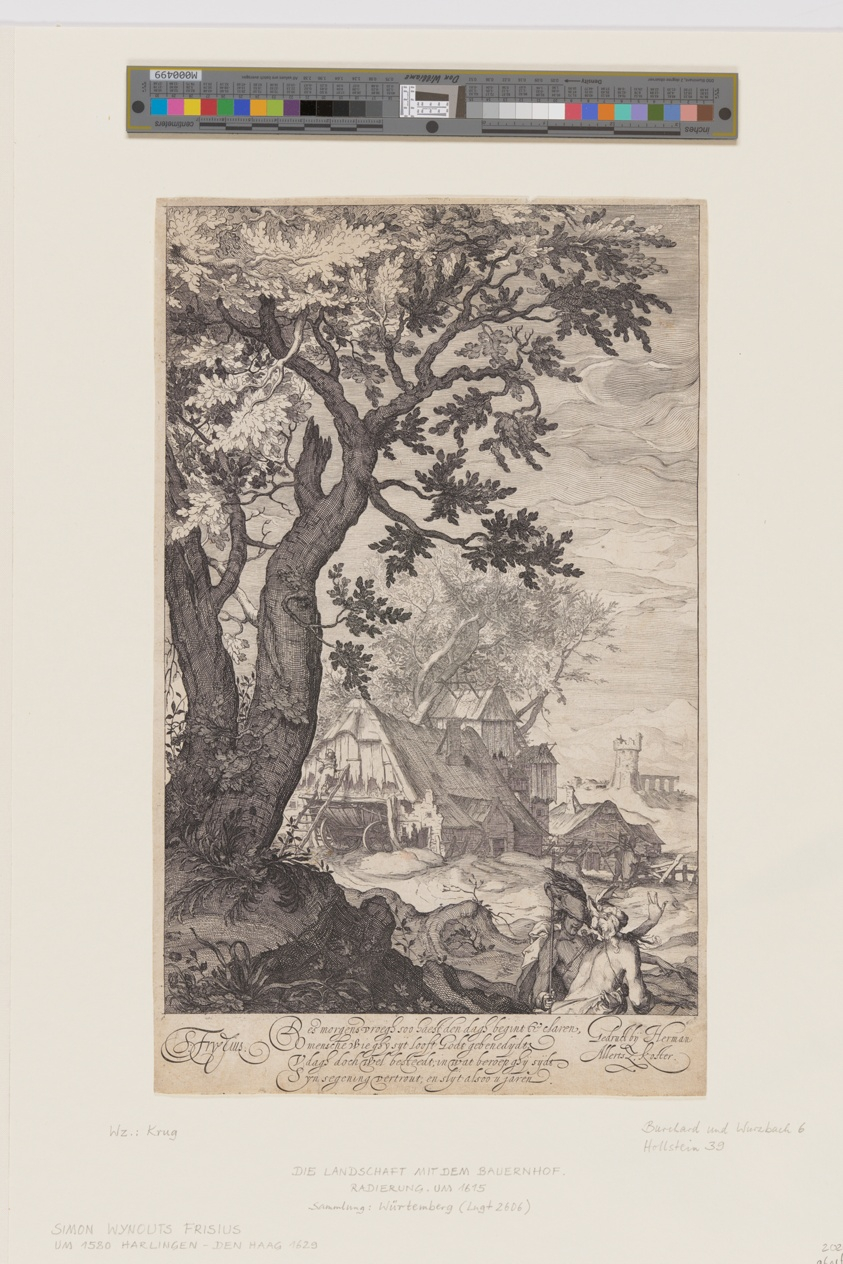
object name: Print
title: Landscape with a Farmhouse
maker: Simon Frisius (Dutch, c. 1580–1629); after Abraham Bloemaert (Dutch, 1566–1651)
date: after 1607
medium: Etching on ivory laid paper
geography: Netherlands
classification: etching; paper; print; prints and drawing